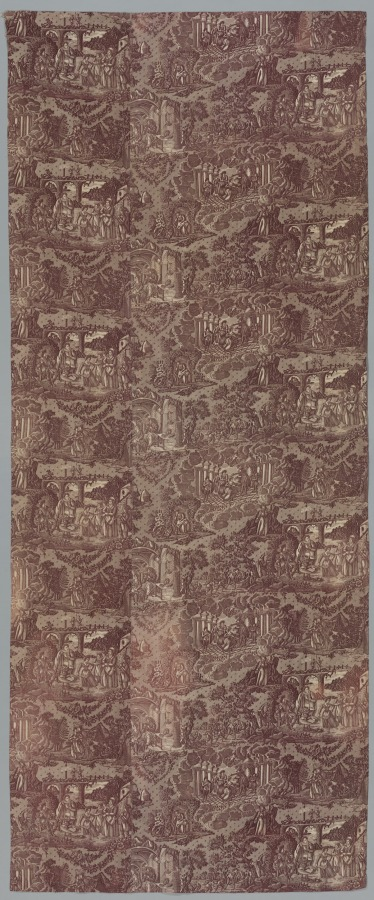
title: "La Treve de Dieu" (The Truce of God)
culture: France, Nantes or Rouen ?, early 19th century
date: c. 1825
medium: copperplate printed cotton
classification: Textile